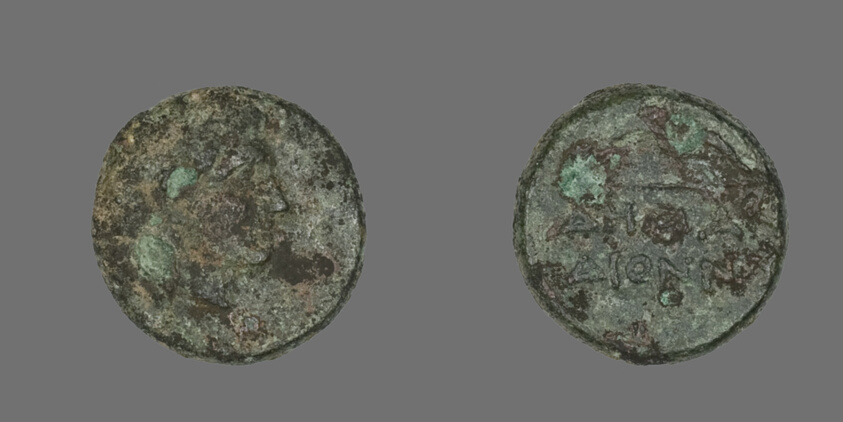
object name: Coin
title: Coin Depicting the God Apollo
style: greek, ancient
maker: Greek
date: about 300-200 BCE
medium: Bronze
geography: Ancient Greece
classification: coin; ancient art